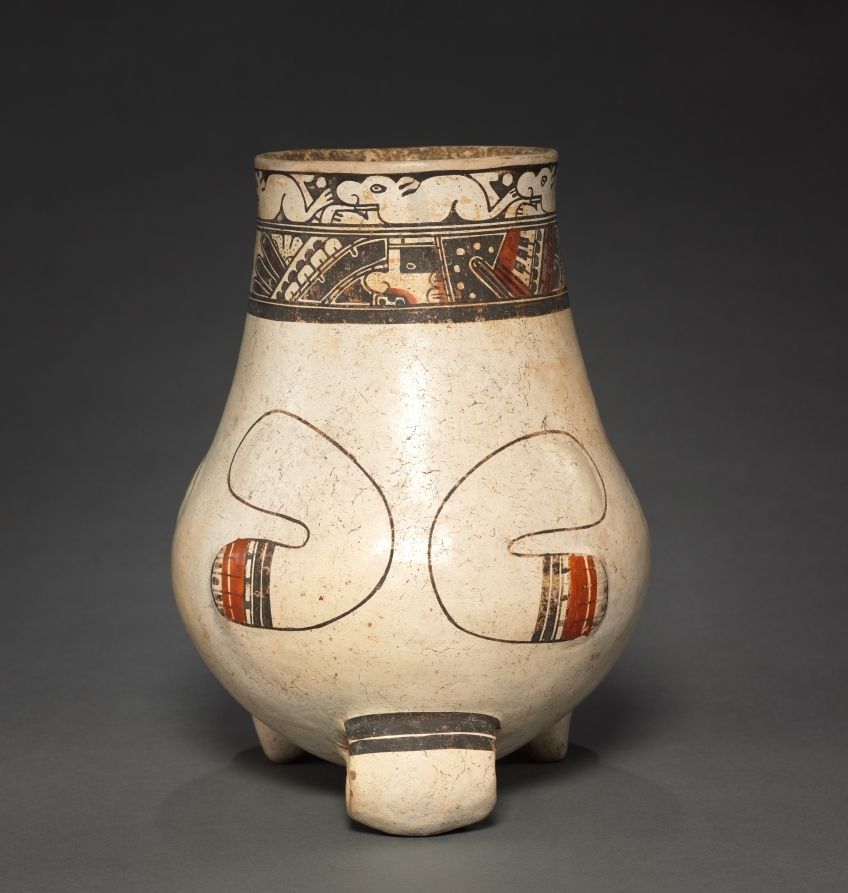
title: Animal Effigy Vessel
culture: Costa Rica, Southern Nicoya region, Pataky Polychrome style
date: 1000–1550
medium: earthenware with colored slips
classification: Ceramic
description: The Pataky style excells in animal portrayals that combine a modeled head with a flat vessel chamber that doubles as the animal’s body. It may be important that many of these animals strike human poses; creatures that combine the human and animal often have mythic import.